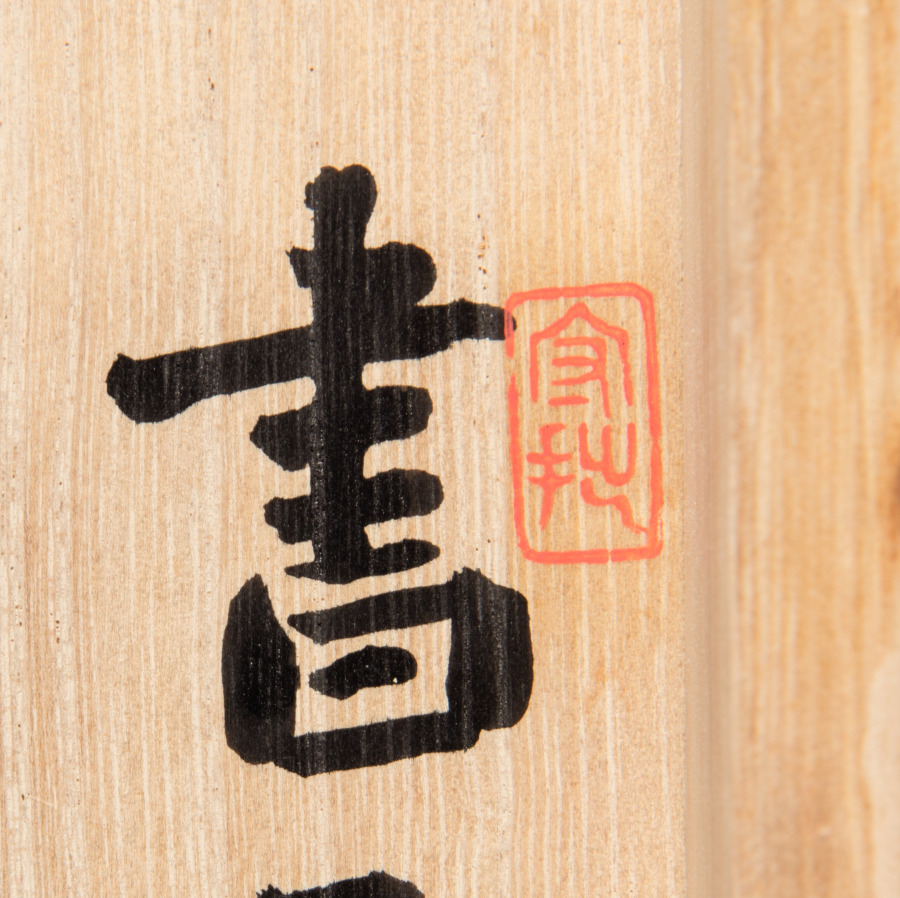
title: Mountain Market, Clear with Rising Mist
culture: Korea, Joseon dynasty (1392–1910)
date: early 1500s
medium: Hanging scroll; ink on silk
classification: Painting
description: This painting depicts several vignettes of the scholar-hermit’s various activities. In the lower left corner, the scholar-hermit is portrayed welcoming his guest in the courtyard. In the middle section on the lower bottom, the scholar and his guest are shown encountering another traveler on the bridge and exchanging their greetings. After crossing the bridge, the scholar visits a friend who lives in a compound of multiple buildings. The two friends decide to take a short walk. Both appear in a terraced cliff, enjoying a mountain vista and the fragrance of an old pine tree carried by the gentle wind. The scholar continues his journey with his two servants. They are portrayed crossing a winding wooden bridge. Right beyond the colossal rocky mountain, a panoramic view to a bustling market place unfolds, suggesting that it may be the place where the scholar-hermit’s entourage would visit. Perhaps the scholar need to buy items such as books, rolls of papers, and brushes, all essential to scholarly life. Toward the upper left corner, another group of travelers is landing on the river bank that leads to the city gate; they may be headed to the multistoried Buddhist stupa nestled on the top of the mountains.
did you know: Due to its stylistic features, this painting has long been believed to be a Chinese painting of the Northern Song period, dated to the 12th century.